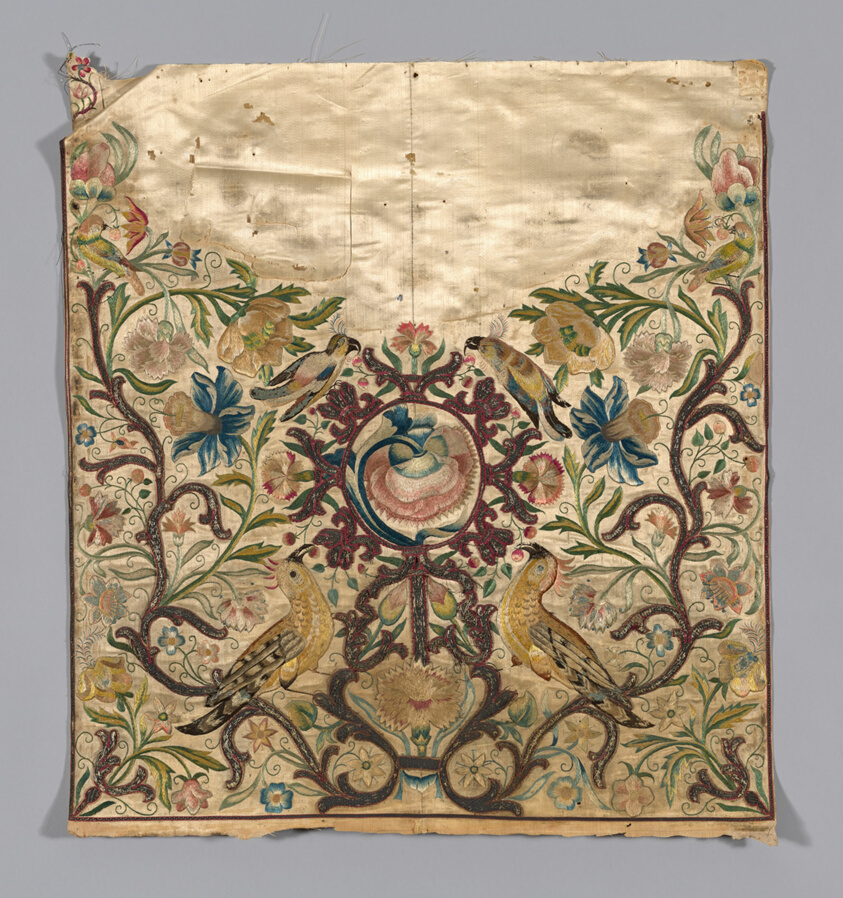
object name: Textile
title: Panel (formerly Cover from a Sedan Chair)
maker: France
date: c. 1720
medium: silk compound weave, brocaded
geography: France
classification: textile; needlework (visual works)